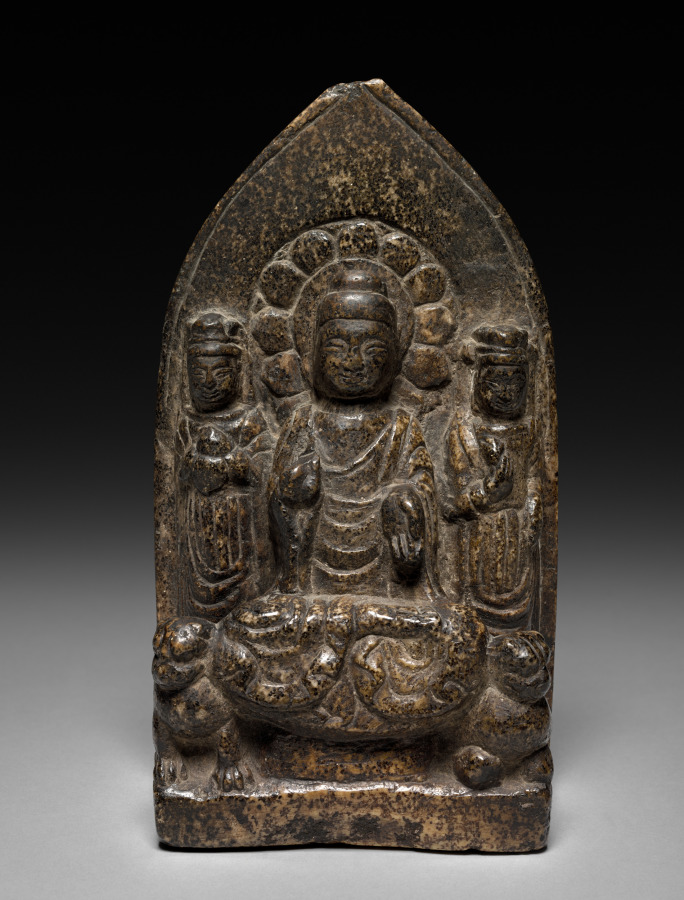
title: Buddha Triad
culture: China, Northern Dynasties period (386–581 CE), Northern Zhou (557-581)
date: 568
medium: stone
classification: Sculpture